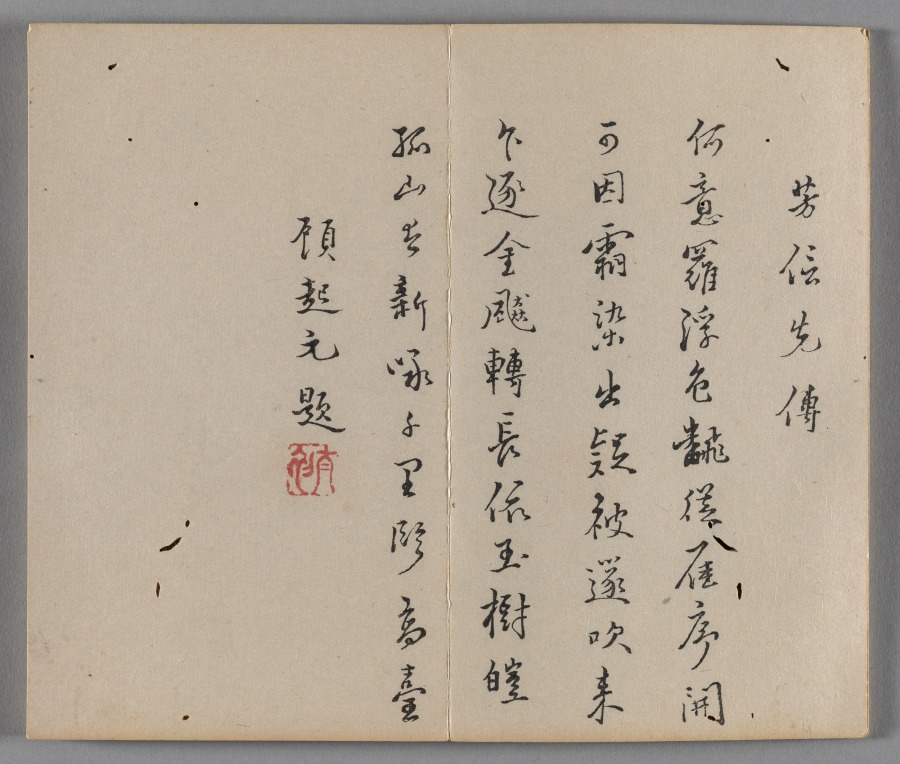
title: Ten Bamboo Studio Painting and Calligraphy Handbook (Shizhuzhai shuhua pu): Plum Blossoms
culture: China, Qing dynasty (1644-1911)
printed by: Hu Zhengyan (Chinese, c. 1584–1674)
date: 1633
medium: Woodblock-printed book; ink and colors on paper; first edition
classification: Print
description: Color printing reached a level of perfection in the early 1600s, as seen in this Ten Bamboo Studio Collection of Calligraphy and Painting and the Mustard Seed Garden Manual of Painting (printed 1679 and 1701). The painterly quality, precision in registering (aligning) the woodblocks, and harmonious colors made them the most successful color print editions in Chinese history. Both editions were printed and compiled in Nanjing, spread nationwide, and had a great impact on the arts in Japan and Korea.